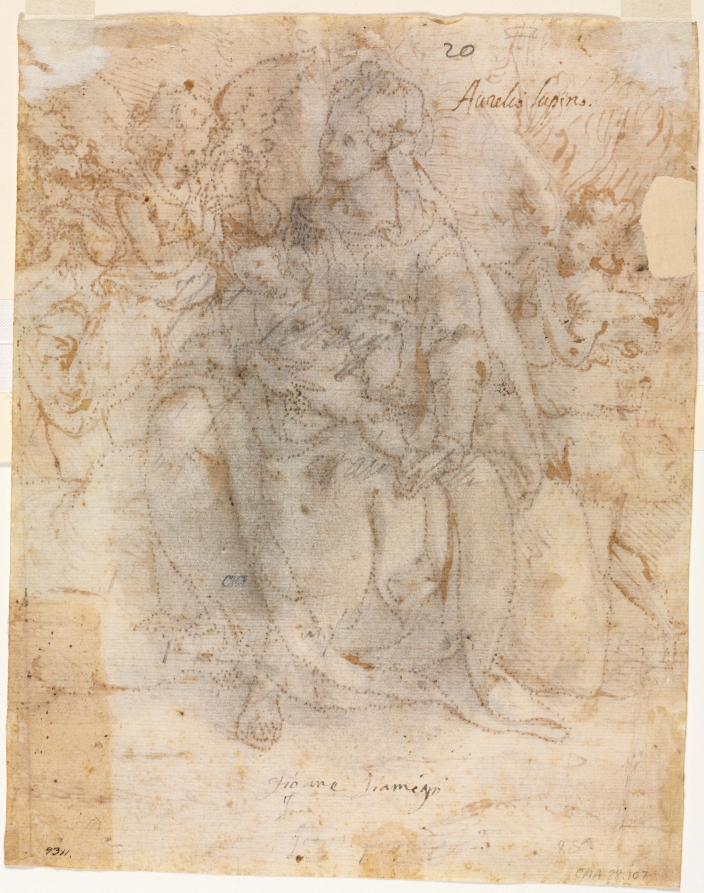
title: Madonna and Child with Angels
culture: Italy, 16th century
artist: Aurelio Luini (Italian, 1530–1593)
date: late 1500s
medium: pen and brown ink and brush and brown wash over black chalk (extended with brush and water in places); pricked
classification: Drawing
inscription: upper left, in black ink: 183: ; lower right, in black ink: Luino ; VERSO, upper right, in brown ink: Aurelio Lupin. ; lower center, in brown ink: Gio ane Fiamig[r?]o ; lower left, in black ink: 9311. ; upper center, in graphite: 20 ; throughout center, in graphite: [illegible] ; lower center, in graphite: G[illegible] [erased] / G[illegible] [erased] ? ; lower right, in graphite: 85[7?]